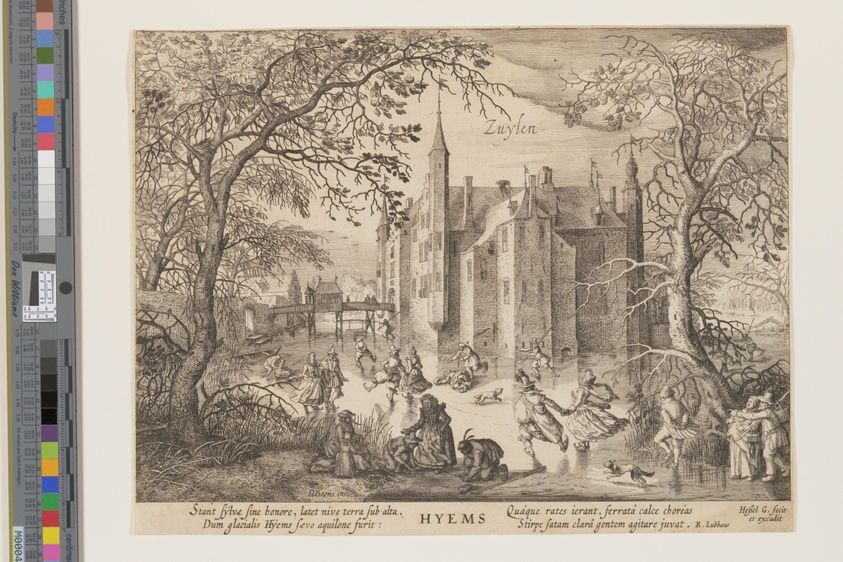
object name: Print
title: Zuylen - Winter, from The Seasons, View of Castles in the Vicinity of Amsterdam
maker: Hessel Gerritsz (Dutch, 1581–1632); after David Vinckboons (Netherlandish, 1576–1629)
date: 1610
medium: Engraving on ivory laid paper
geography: Netherlands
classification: engraving; paper; print; prints and drawing